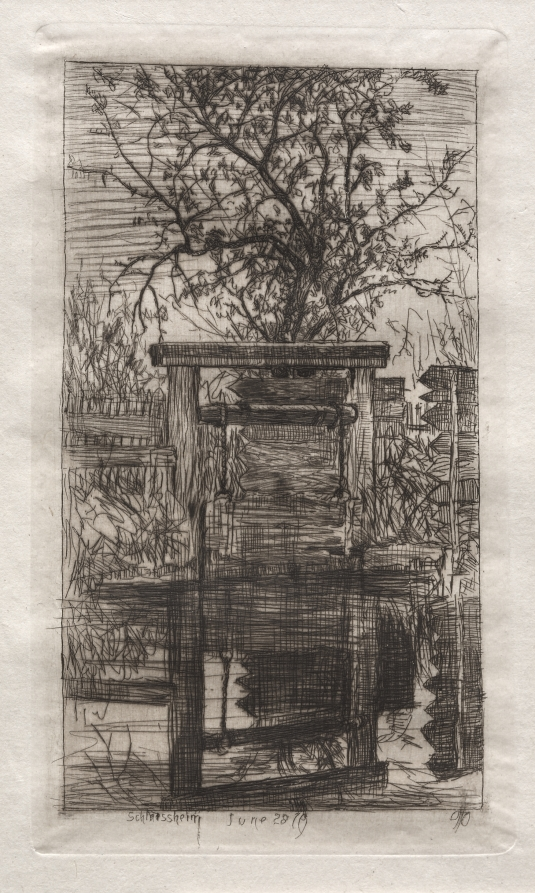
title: The Lock, Schleissheim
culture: America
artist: Otto H. Bacher (American, 1856–1909)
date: 1879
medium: etching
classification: Print